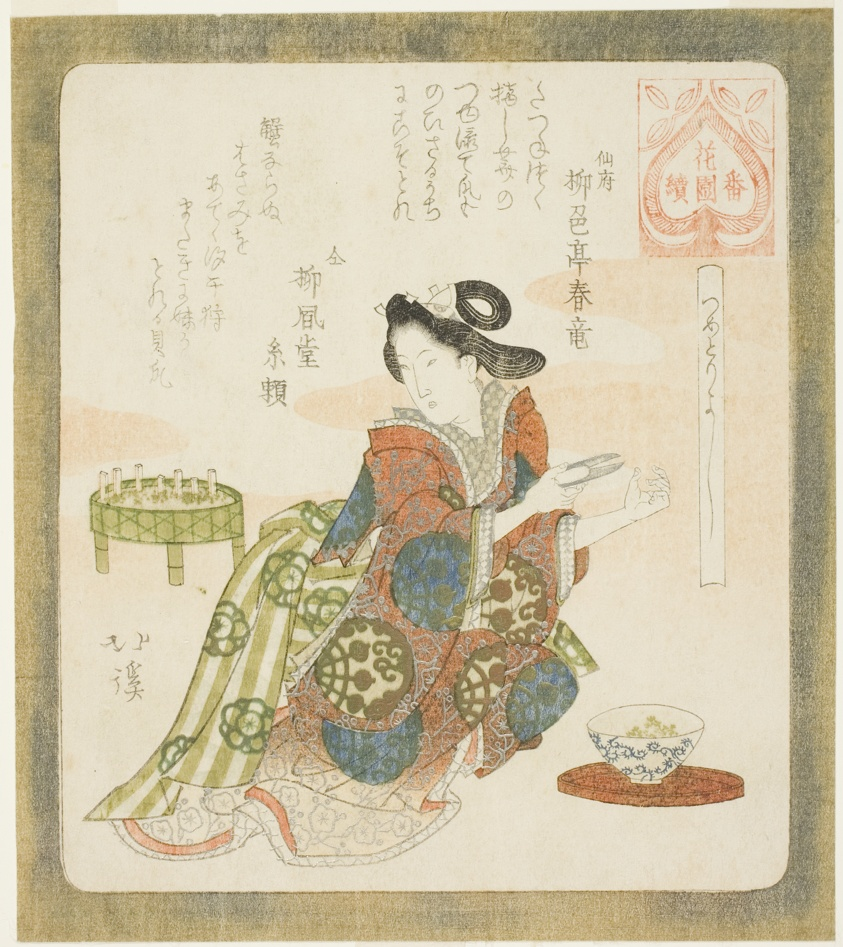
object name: Print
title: It is good to cut one's fingernails (Tsume tori yoshi), from the series "A Series for the Hanazono Group (Hanazono bantsuzuki)"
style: Japanese (culture or style)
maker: Totoya Hokkei (Japanese, 1780-1850)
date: c. 1822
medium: Color woodblock print; shikishiban, surimono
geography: Japan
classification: woodblock print; print; asian art